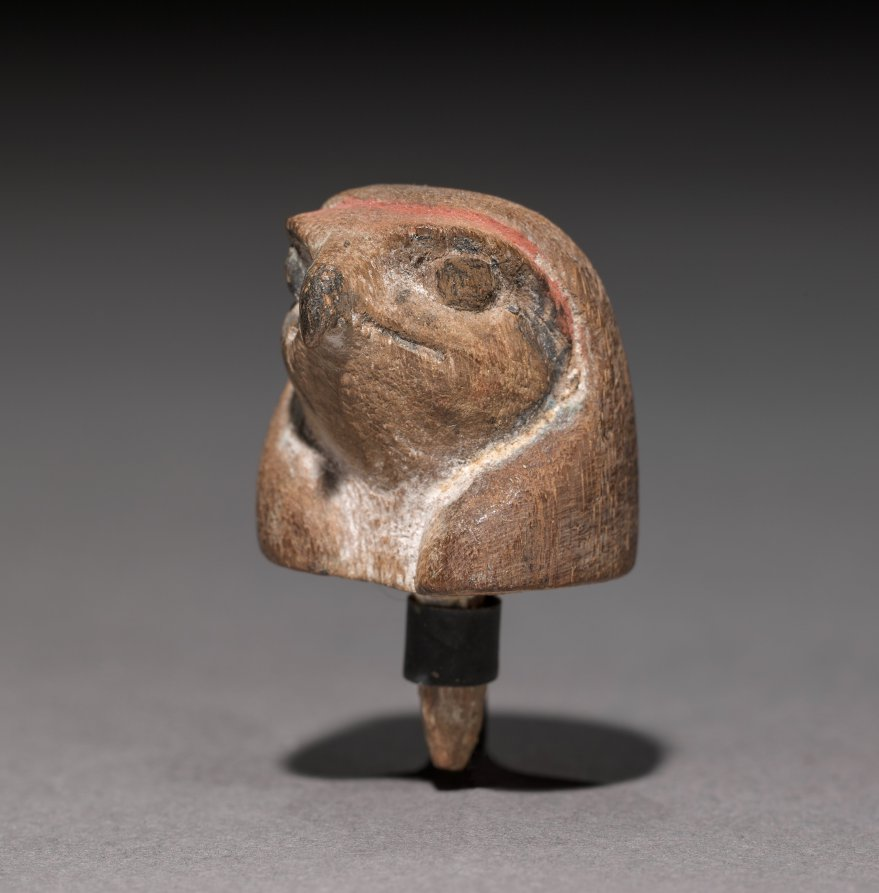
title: Falcon Head Steering Oar Butt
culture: Egypt, Middle Kingdom (2040–1648 BCE)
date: 2040–1648 BCE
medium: wood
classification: Funerary Equipment